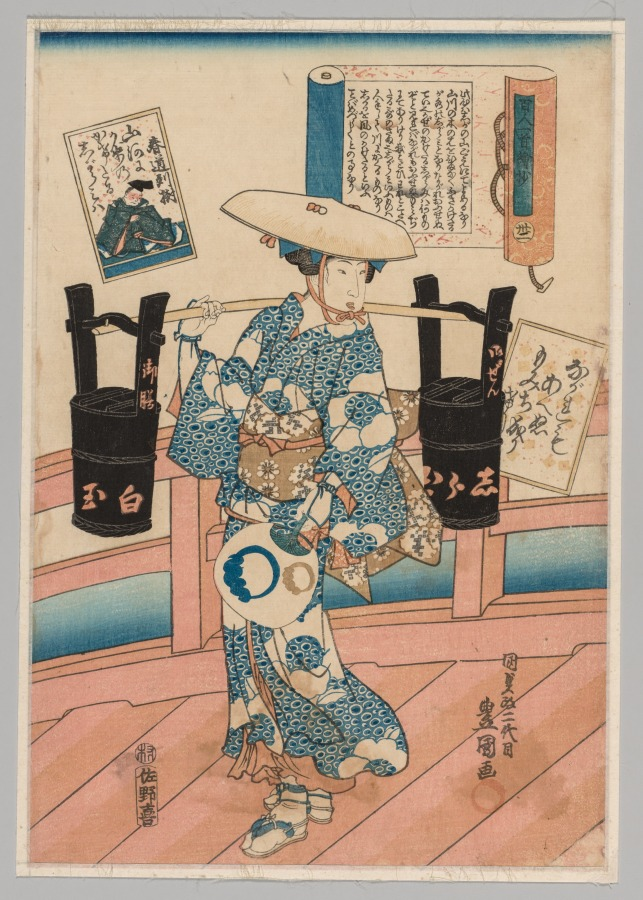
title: Harumichi no Tsuraki from the series A Pictorial Commentary on One Hundred Poems by One Hundred Poets, no. 31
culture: Japan, Edo period (1615–1868)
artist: Utagawa Kunisada (Japanese, 1786–1865)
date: 1844–47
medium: color woodblock print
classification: Print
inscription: Signature: Kunisada the Second Toyokuni